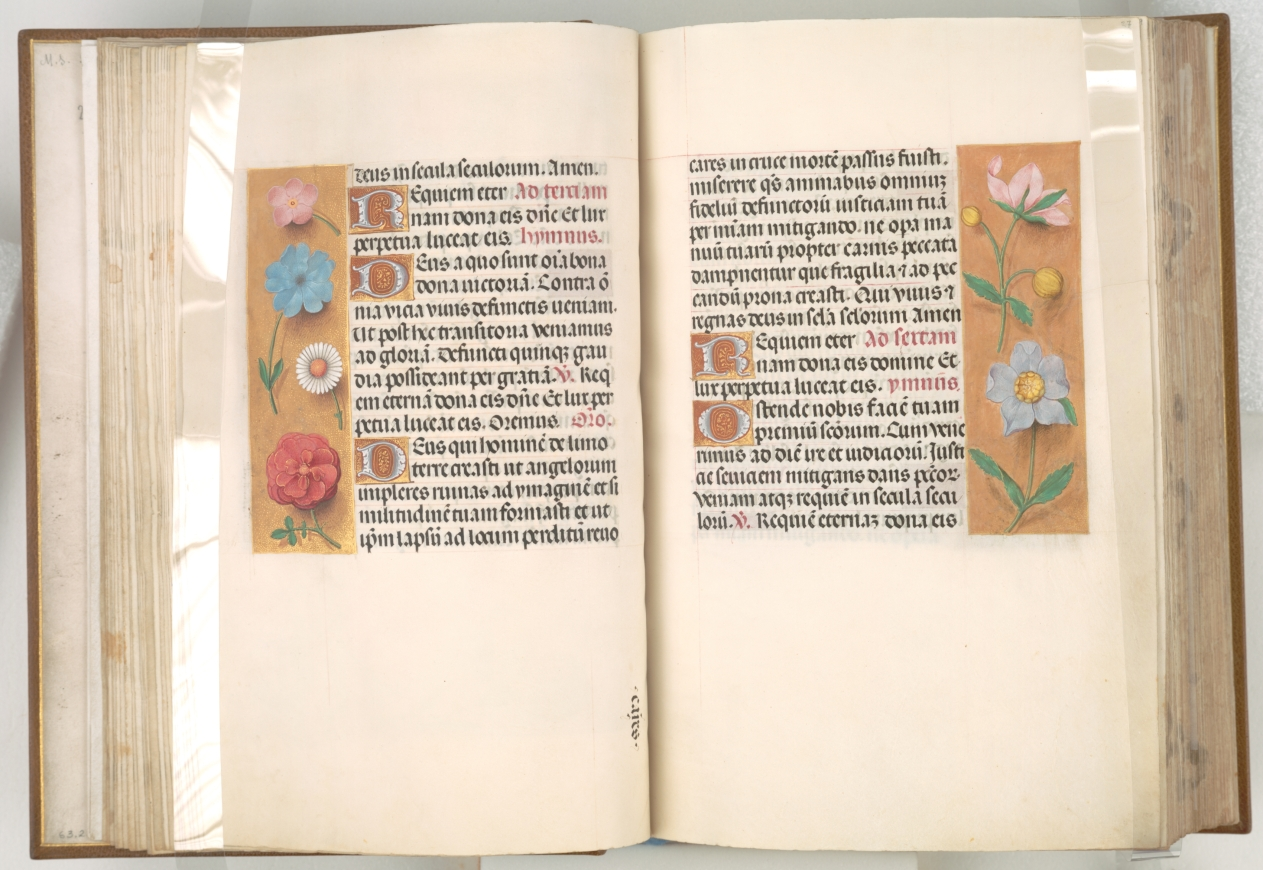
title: Hours of Queen Isabella the Catholic, Queen of Spain: Fol. 27r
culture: Flanders, Ghent and Bruges, late 15th century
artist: Master of the First Prayerbook of Maximillian (Flemish, c. 1444–1519)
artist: and Associates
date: c. 1500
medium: ink, tempera, and gold on vellum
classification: Bound Volume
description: A great lover of Flemish art, Queen Isabella treasured her many devotional books. This deluxe manuscript was created for her private devotions by highly organized and distinctly talented manuscript painters active in Ghent and Bruges. The Ghent-Bruges school represents the culmination of Flemish book painting, whose main features were the use of rich colors, illusionistic effects, a love of landscape, and a strong sense of visual narrative. Manuscripts produced by this circle of artists are renowned for their border decoration featuring a rich variety of realistically painted flowers, scrolling acanthus leaves, birds, and butterflies.